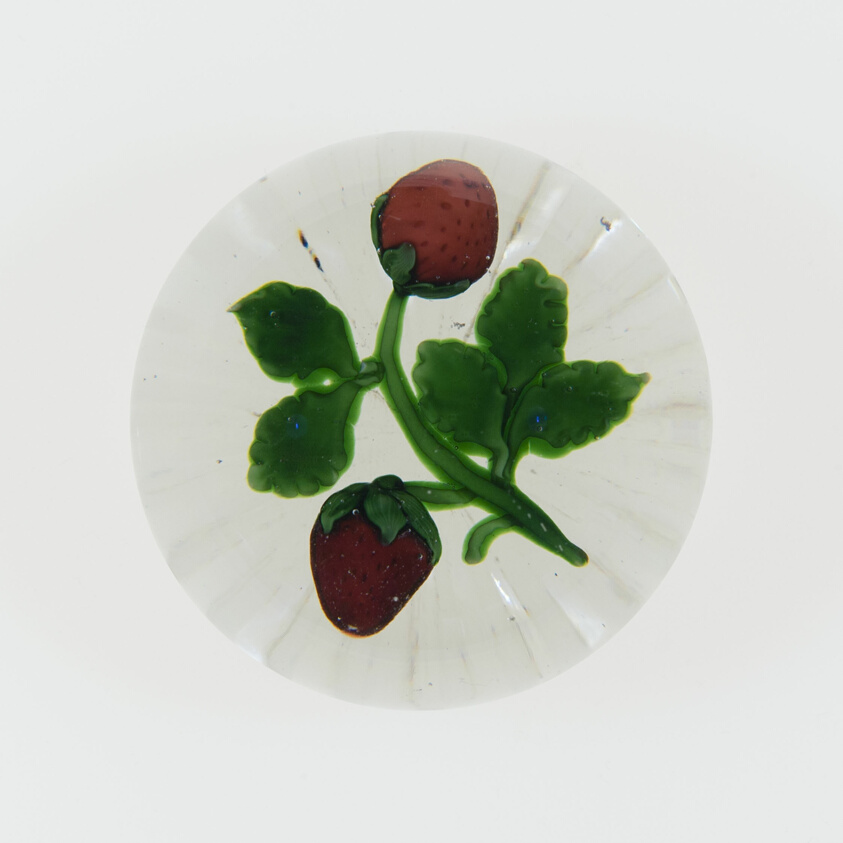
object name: Glass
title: Paperweight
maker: Baccarat Glassworks (Cristalleries de Baccarat); Lorraine, France, founded 1764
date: c. 1845–60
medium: Glass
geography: Baccarat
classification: paperweight; glass